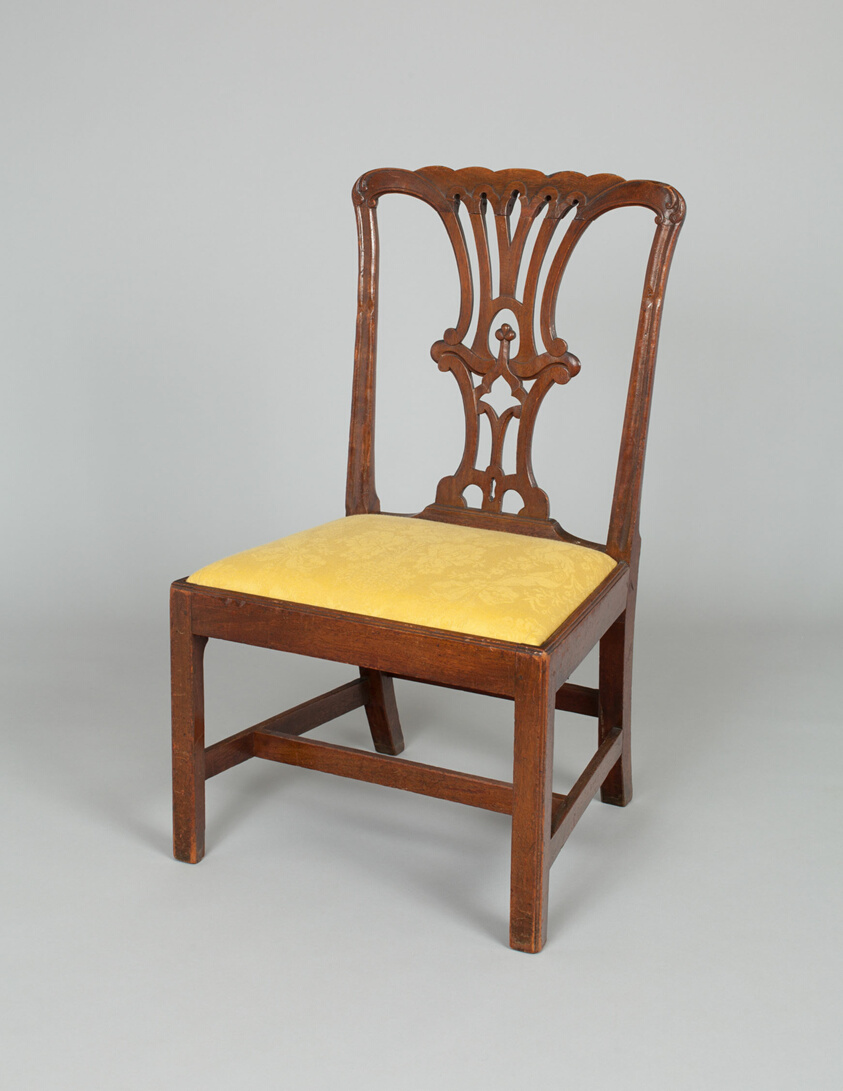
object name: Furniture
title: Pair of Side Chairs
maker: Artist unknown (American, 18th century); New York City, New York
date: 1770–90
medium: Mahogany, tulipwood, white pine, and upholstery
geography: New York City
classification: seating; furniture; american decorative arts; american arts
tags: furniture